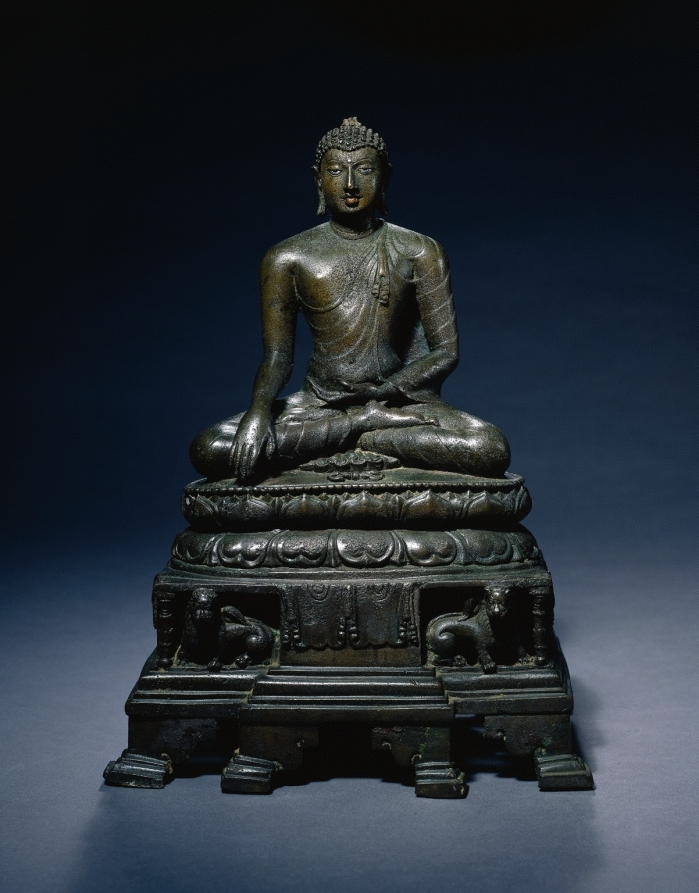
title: Akshobhya: the Buddha of the East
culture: Northeast India, Bihar, Kurkihar, Pala period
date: late 800s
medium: bronze with silver and copper inlay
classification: Sculpture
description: Made during the Pala period (750-1134) when tantric imagery was first emerging in northeastern India, this sculpture is from a cache that yielded some of the most masterful works of the north Indian bronze tradition. From this region, Tantra spread to Southeast Asia. The double-headed thunderbolt, or vajra, placed on top of the pedestal in front of the figure indicates that this is a tantric image. His hand gestures identify him as one of the Five Cosmic Buddhas, each of whom is associated with a cardinal direction of space: north, south, east, west, and center. The Buddha Akshobhya is especially invoked to eradicate the harmful emotion of anger.